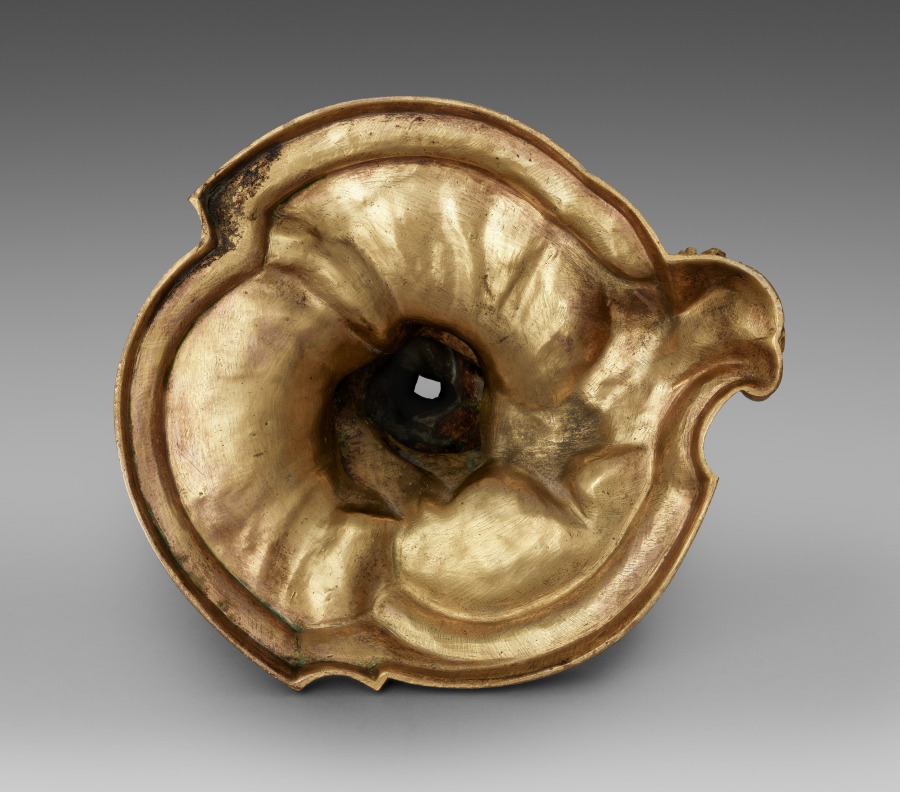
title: Candlestick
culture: France, 18th century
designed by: Juste-Aurèle Meissonnier (French, 1695–1750)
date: c. 1740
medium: gilt metal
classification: Furniture and woodwork